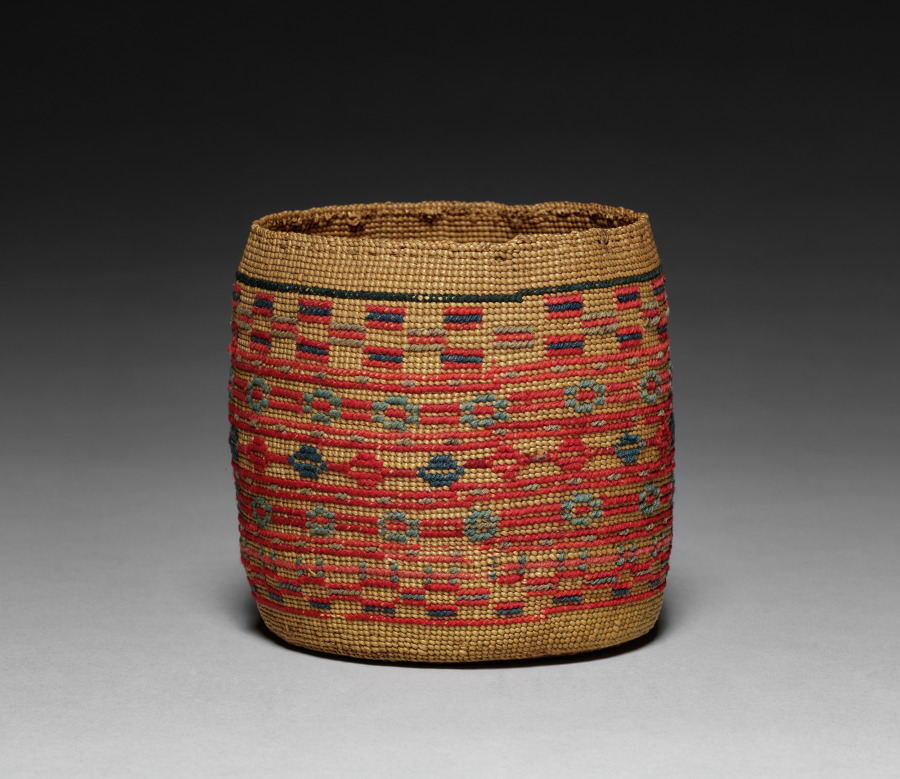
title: Basket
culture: Arctic, Aleut, late 19th-early 20th century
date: late 1800s–early 1900s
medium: wool embroidery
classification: Basketry